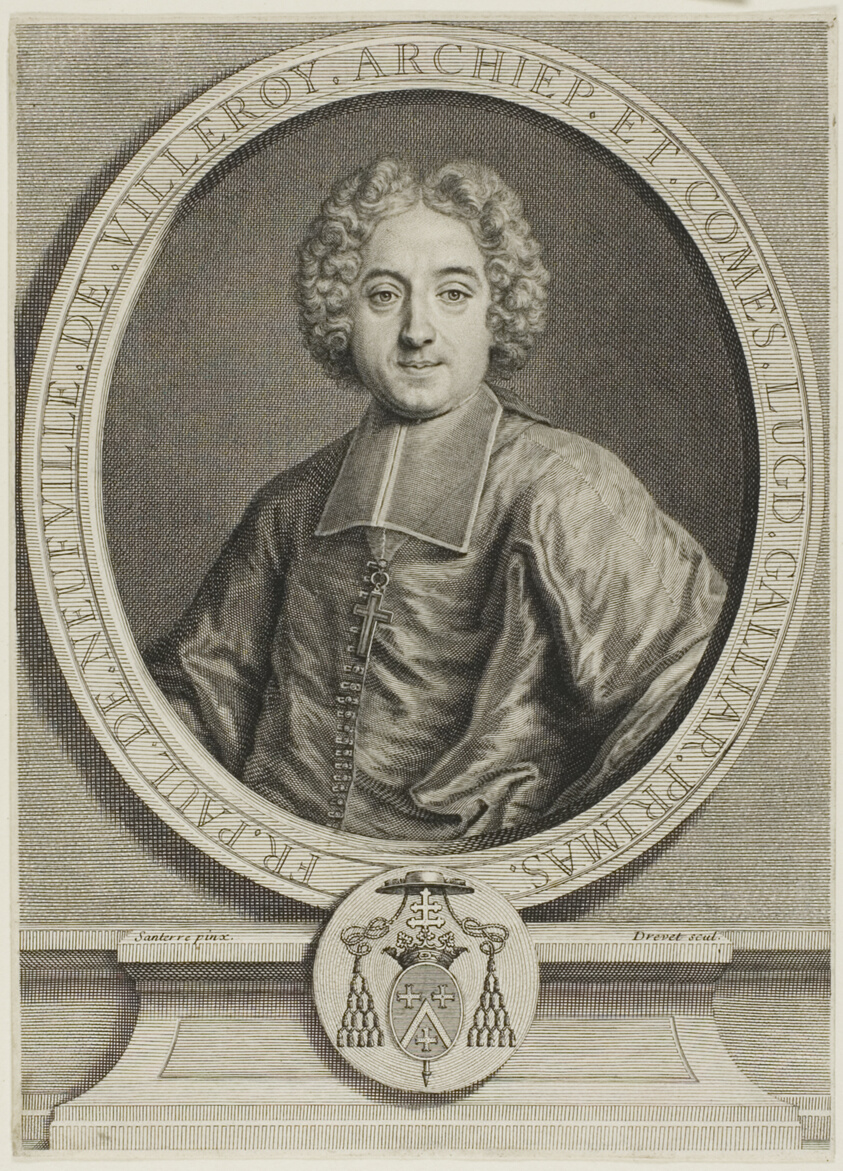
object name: Print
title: Portrait of François-Paul de Neufville de Villeroy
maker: Pierre-Imbert Drevet (French, 1697-1739); after Jean-Baptiste Santerre (French, 1651-1717)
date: c. 1731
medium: Engraving on ivory laid paper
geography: France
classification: engraving; print; prints and drawing